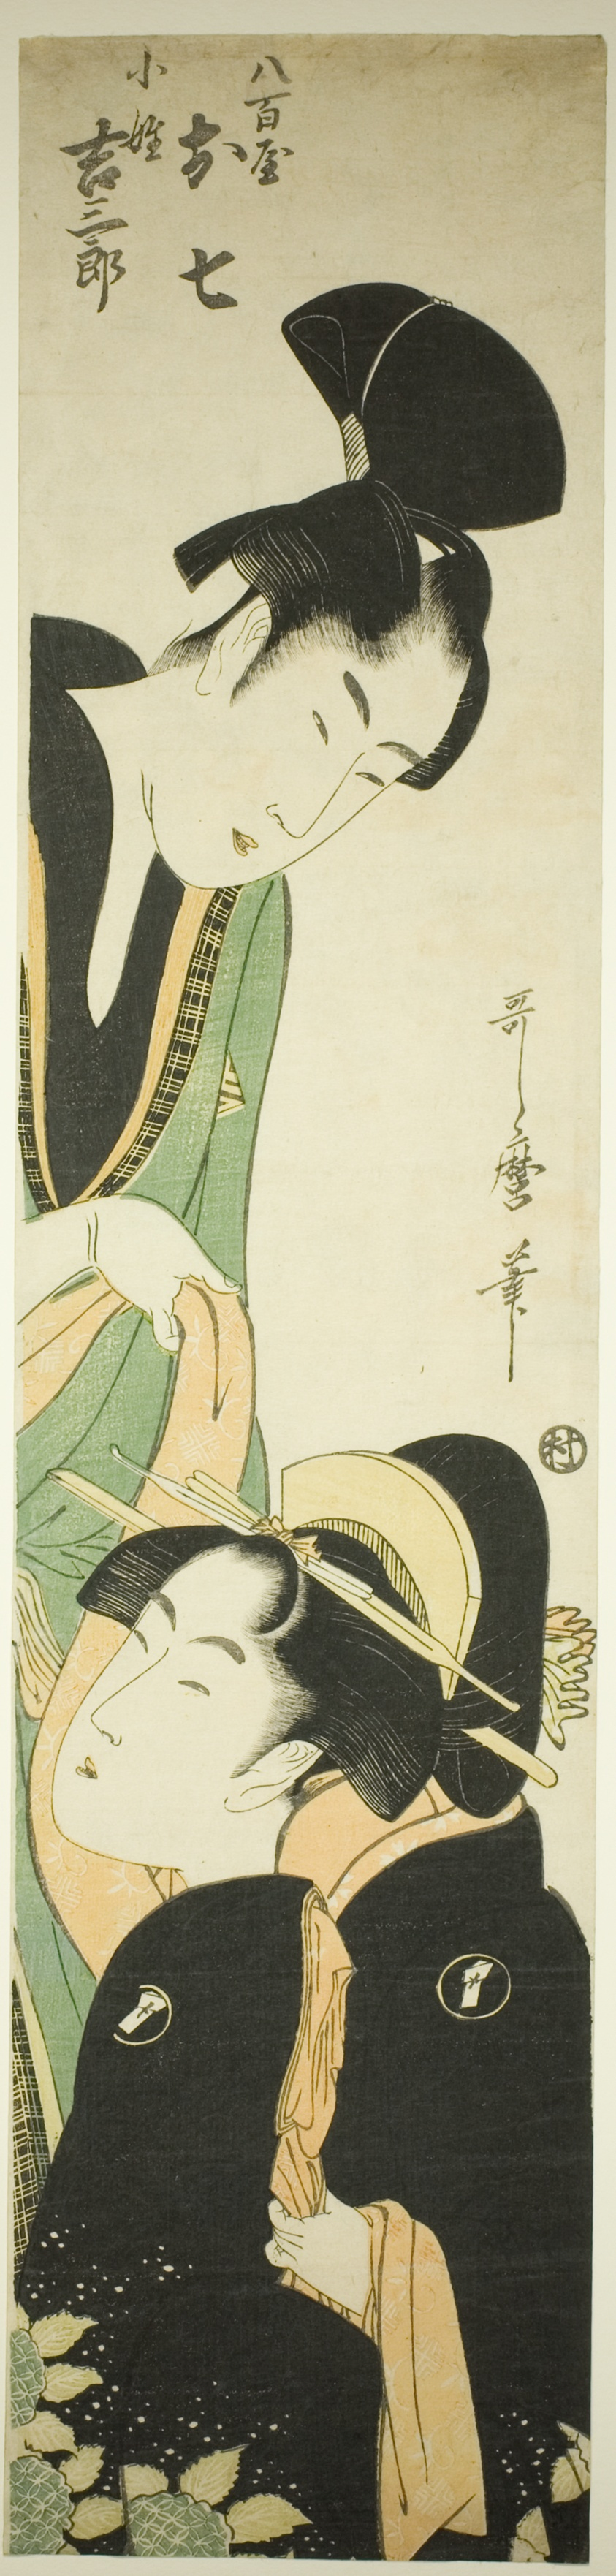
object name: Print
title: Yaoya Oshichi and Kosho Kichisaburo (Yaoya Oshichi and Kosho Kichisaburo)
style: Japanese (culture or style)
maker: Kitagawa Utamaro 喜多川 歌麿; Japanese, 1753 (?)-1806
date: c. 1800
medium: Color woodblock print; hashira-e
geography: Japan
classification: woodblock print; print; asian art